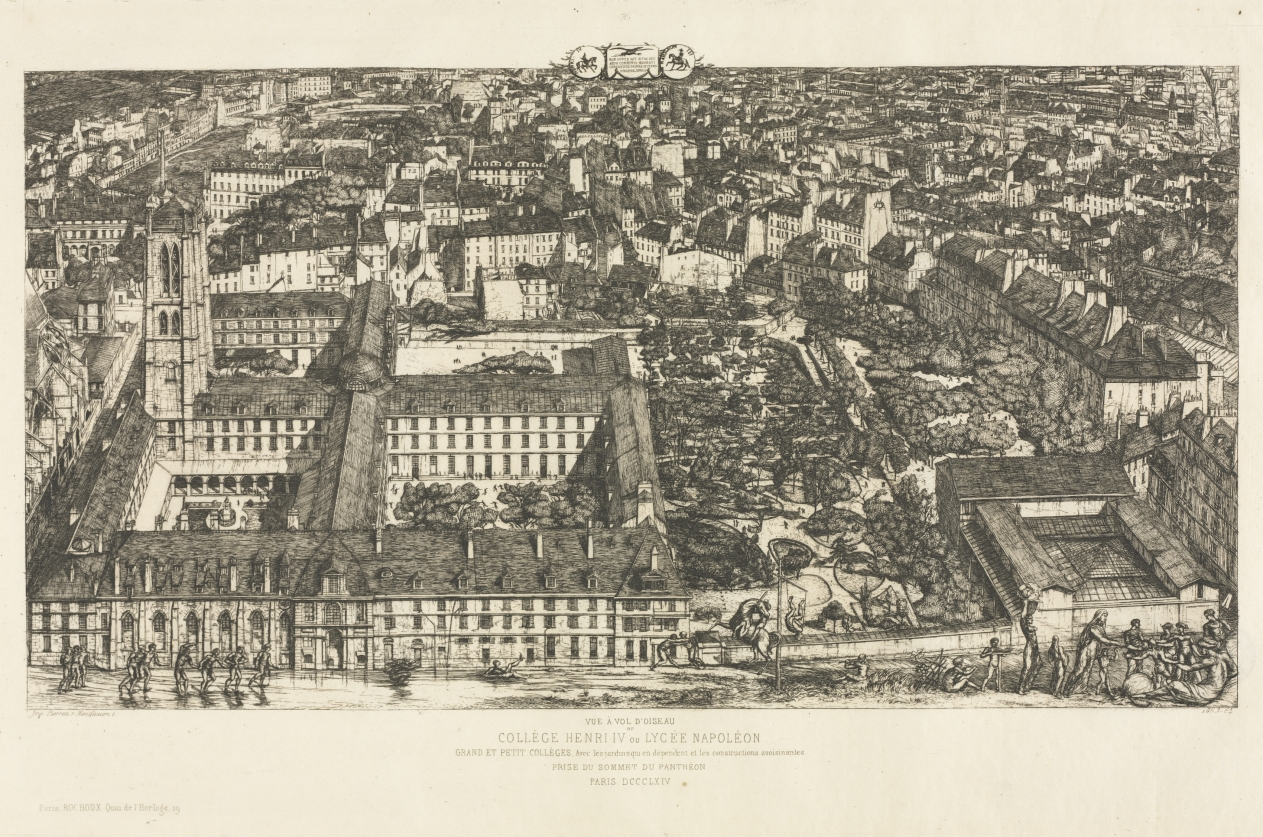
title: College Henri IV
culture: France, 19th century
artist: Charles Meryon (French, 1821–1868)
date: 1863–64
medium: etching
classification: Print